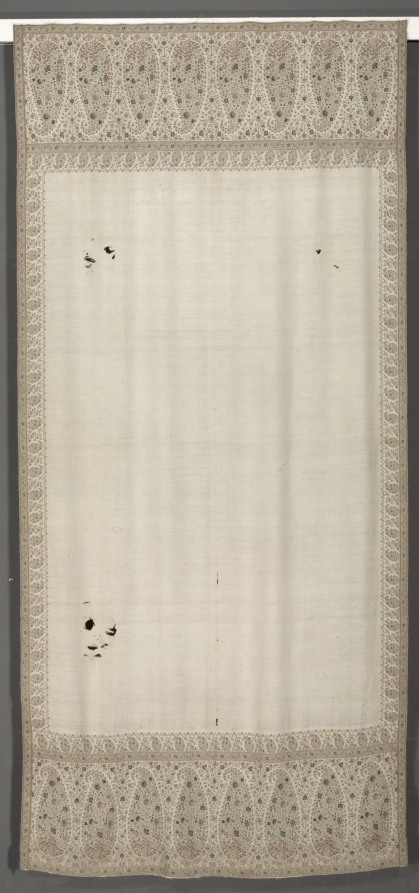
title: Long Shawl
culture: Europe (England, Scotland or France), 19th century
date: c. 1815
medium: Twill weave ground with supplementary weft pattern in 2/1 (Z) weave twill; silk, cotton; clipped pattern wefts on back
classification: Textile